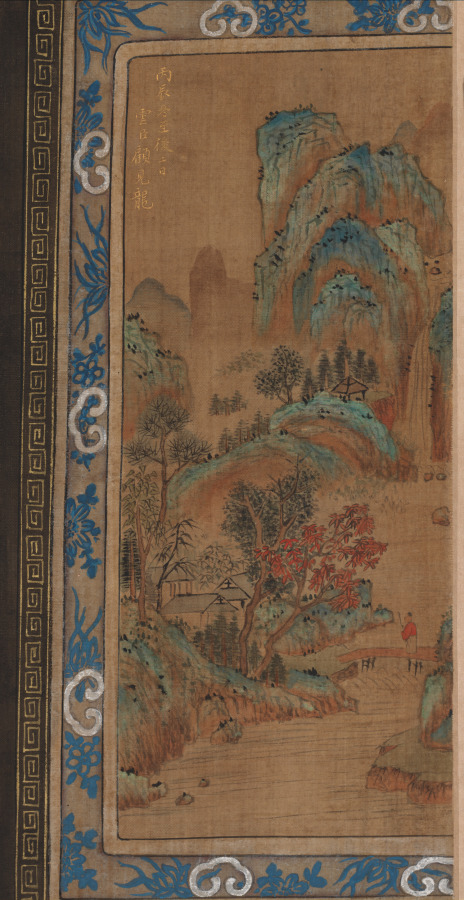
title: Yang Guifei Leaving the Bath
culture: China, Qing dynasty (1644-1911)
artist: Gu Jianlong (Chinese, 1606–after 1689)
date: 1700s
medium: Hanging scroll; ink, colors and gold on silk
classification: Painting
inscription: 丙辰冬至後二日 雲臣顧見龍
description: This painting relates to the legendary love story between Tang dynasty (618–906) emperor Xuanzong and his consort, the beautiful Yang Guifei. Set in what appears to be an 18th-century southern interior, the artist depicts Yang Guifei in a fashionable dress of semitransparent red gauze. Due to the warm and humid climate in China’s southeast, local silk workshops specialized and excelled in making airy gauze garments. Yang’s nude body can be seen through the red robe as she leaves the bath. Her servant offers her a bowl of soup. The presence of a male figure would have been a breach of customary protocol; cross-dressed as a male scholar, the earrings reveal that Yang’s attendant is in fact a girl.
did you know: Due to the warm and humid climate in China’s southeast, silk workshops specialized in making airy gauze garments, like the one worn by Yang Guifei here.